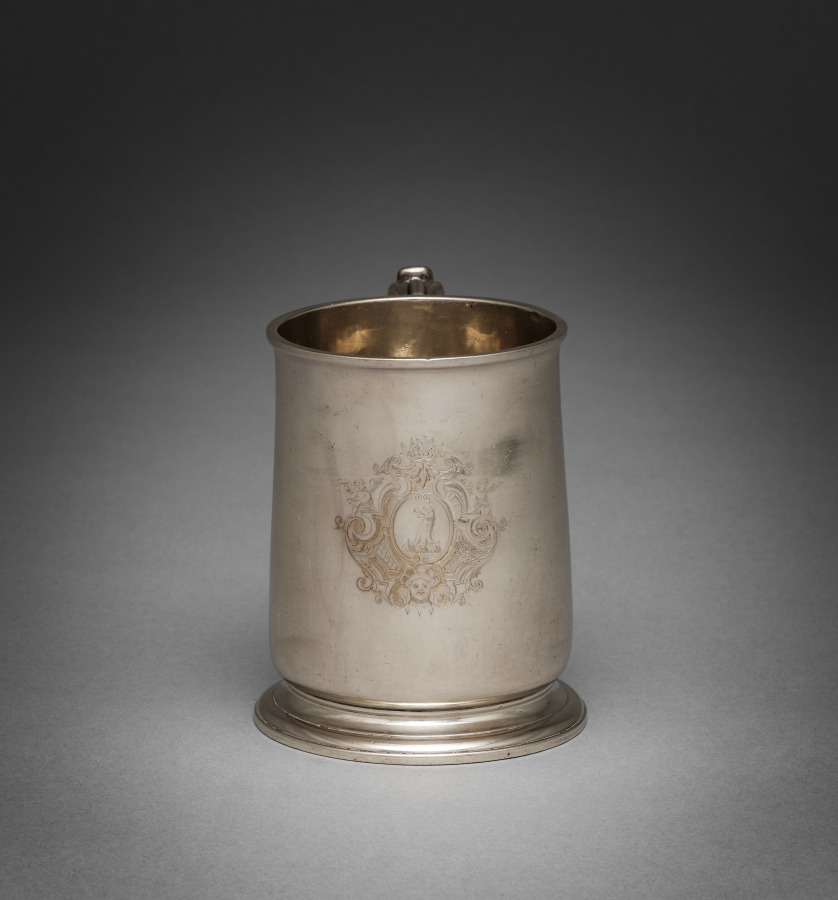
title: Cann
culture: England, 18th century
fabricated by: Paul Jacques de Lamerie (British, 1688–1751)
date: 1727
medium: silver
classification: Silver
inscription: engraved on front: crest of griffin's head erased and mantling in contemporary style. (This crest was widely used and therefore the first owner cannot be identified.)